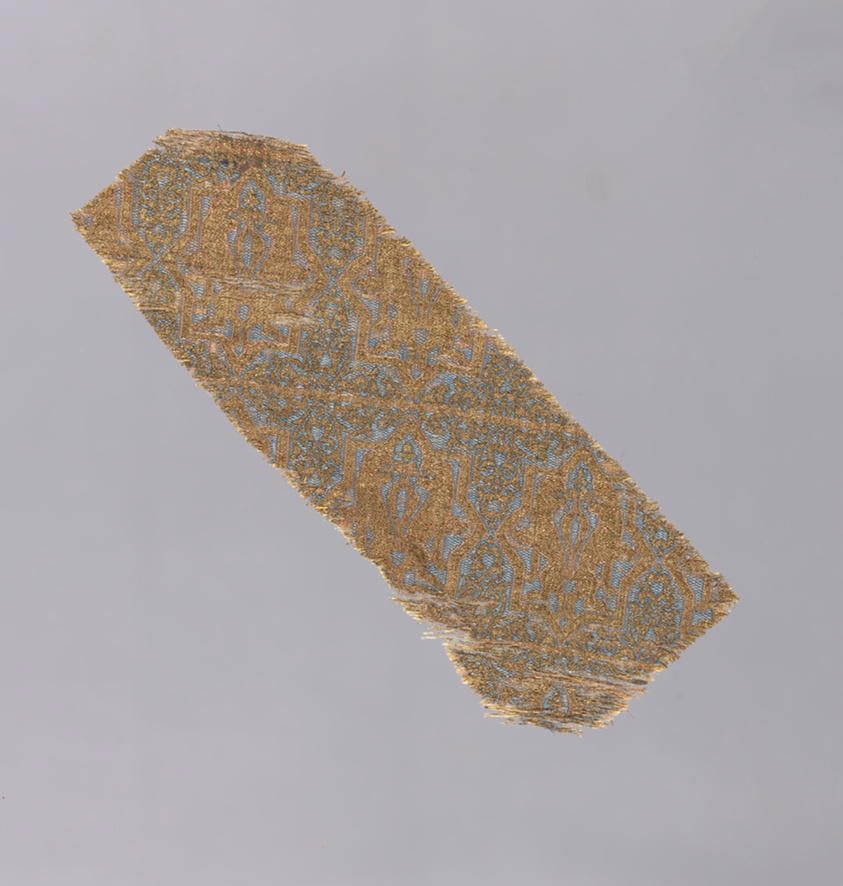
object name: Textile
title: Fragment From the Chasuble of San Valero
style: moorish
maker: Spain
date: 13th century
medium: Silk and gilt-animal-substrate-wrapped silk, weft-faced three-color complementary weft plain weave with inner warps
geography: Spain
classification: textile; weaving; liturgical